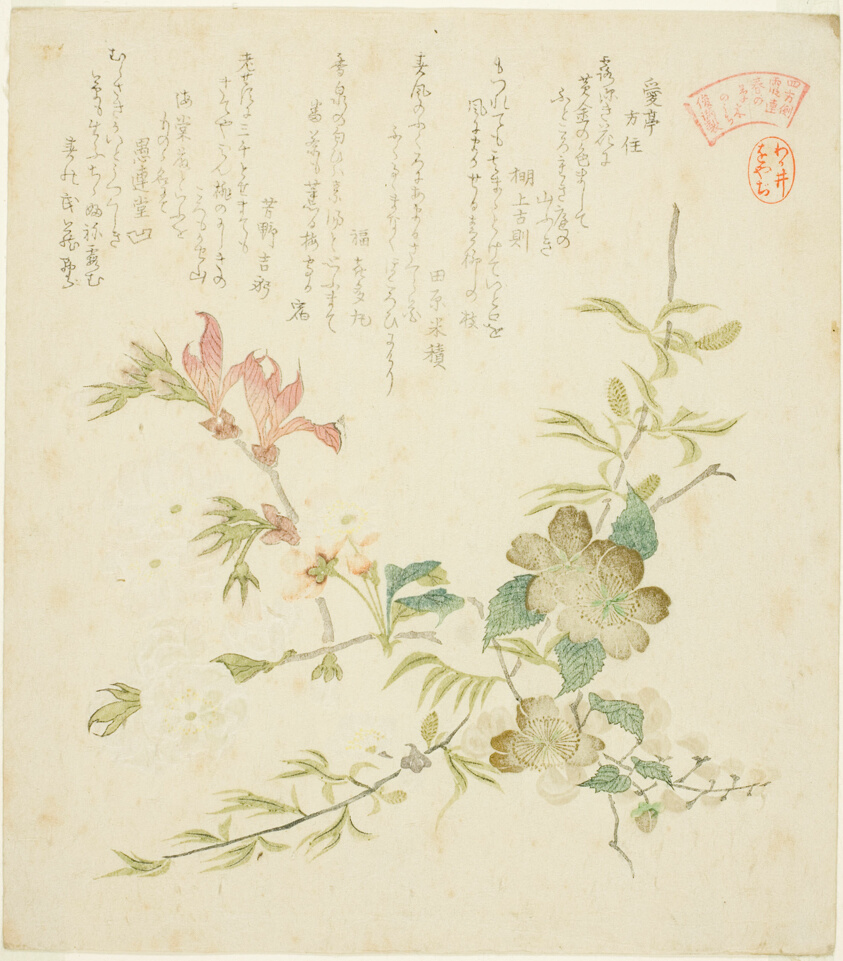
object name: Print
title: Various Spring Flowers, from the series "Springtime Plants and Trees for the Kasumi Poetry Circle of the Yomo Group (Yomogawa Kasumi-ren haru no kusaki no uchi)"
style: Japanese (culture or style)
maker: Kubo Shunman (Japanese, 1757–1820)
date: c. 1820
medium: Color woodblock print; shikishiban sheet from an album, surimono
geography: Japan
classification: woodblock print; print; asian art